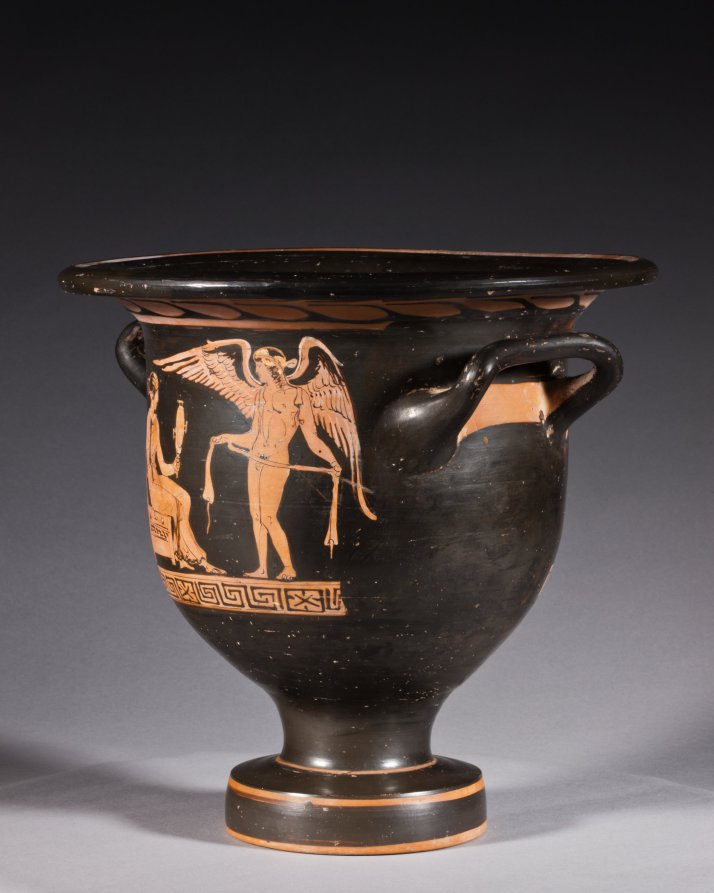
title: Red-Figure Bell Krater (Mixing Vessel): Aphrodite and Eros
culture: South Italian, Apulian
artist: attributed to Graz Painter (South Italian, Apulian, active c. 380–360 BCE)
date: c. 370–360 BCE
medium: ceramic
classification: Ceramic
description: This small mixing vessel shows a finely dressed woman seated on a chest and holding up a mirror to admire herself. Before her stands Eros, the winged god of love, holding a ribbon or sash. Behind the woman stands a pillar with the inscription ΑΦΡΟΔΙΤΗ, or APHRODITE, the goddess of love. Such labels are rare on vases, and scholars debate whether this names the woman shown as Aphrodite herself, with her son Eros, or a bride envisioning herself as Aphrodite, just before her wedding.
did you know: The dancing nude youths on the reverse are unusual; typically they would be standing and draped.